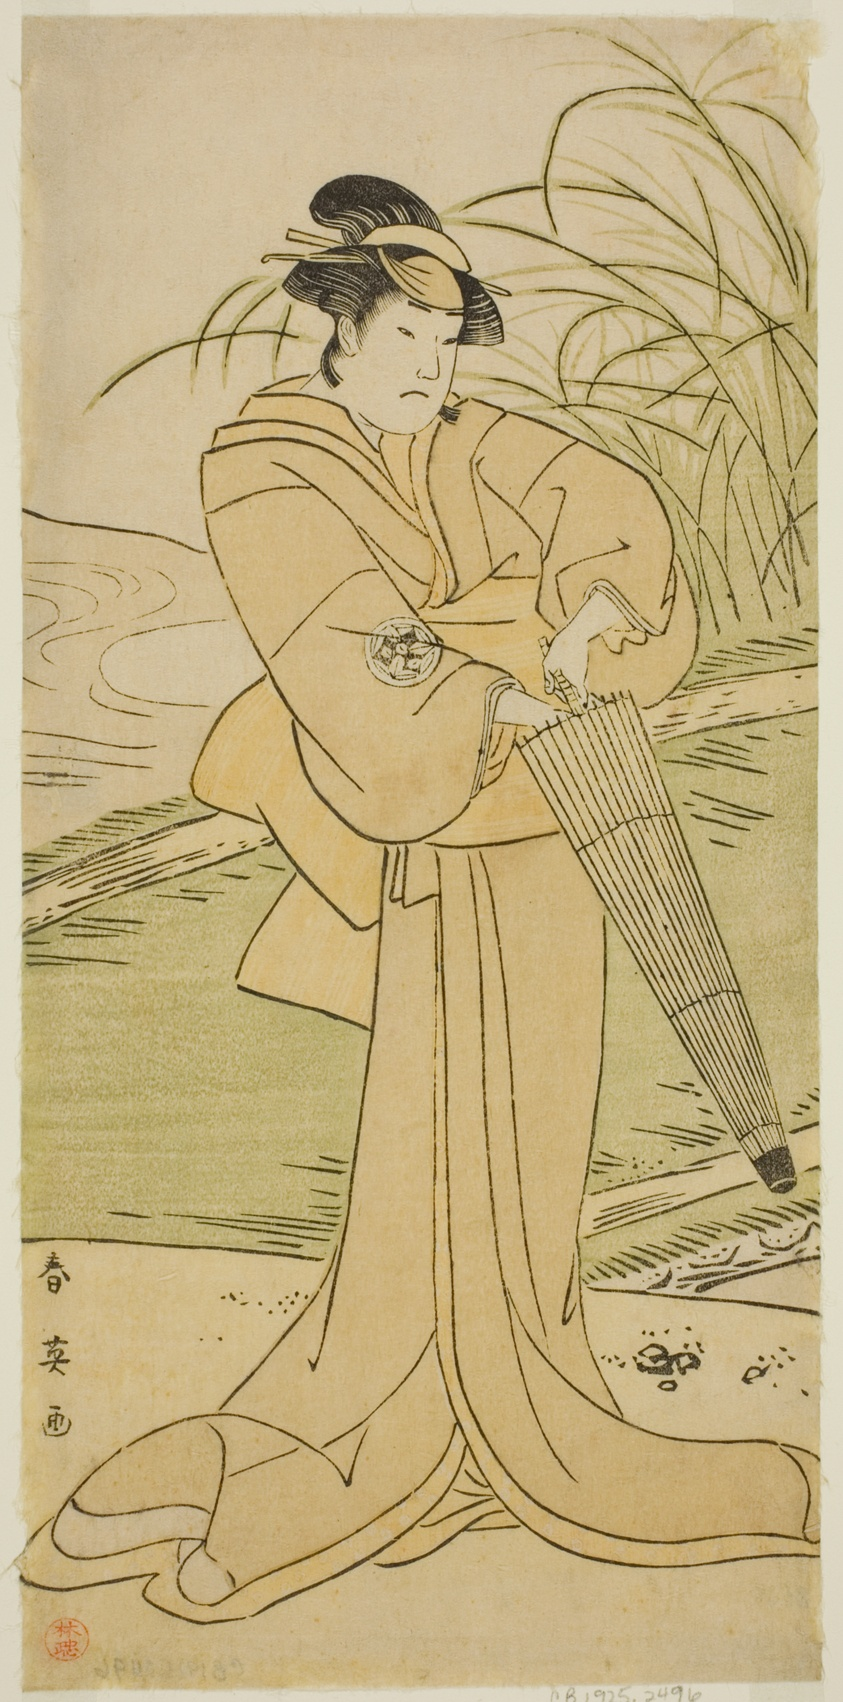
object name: Print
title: The Actor Yamashita Kinsaku II as Okaya in the Play Yomogi Fuku Noki no Tamamizu, Performed at the Kiri Theater in the Fifth Month, 1795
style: Japanese (culture or style)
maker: Katsukawa Shun'ei (Japanese, 1762-1819)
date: c. 1795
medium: Color woodblock print; hosoban; from a multisheet composition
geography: Japan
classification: woodblock print; print; asian art